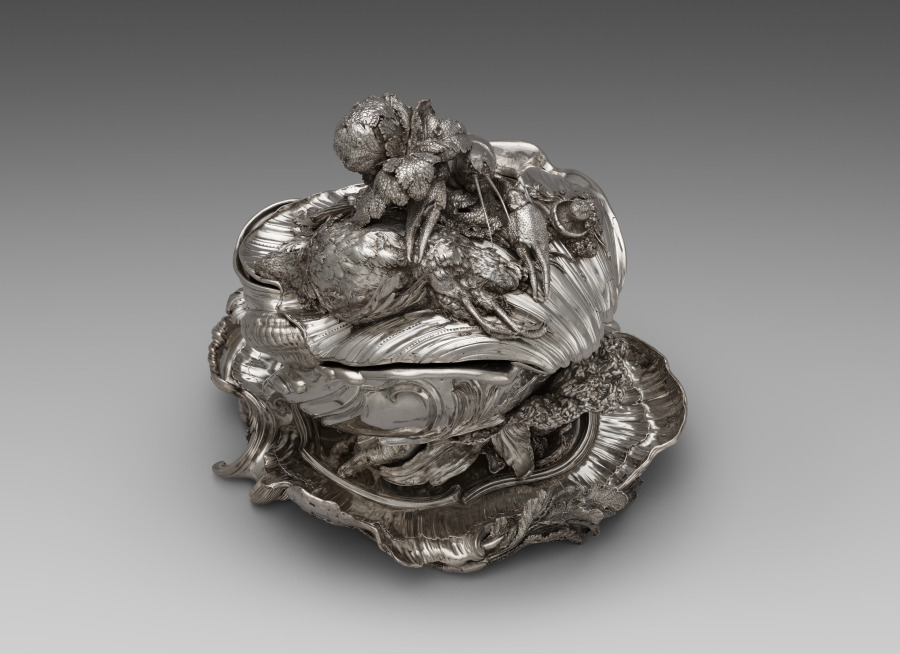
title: Covered Tureen on Stand (Pot-à-oille)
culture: France, Paris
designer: Juste-Aurèle Meissonnier (French, 1695–1750)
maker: Pierre-François Bonnestrenne (French)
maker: Henry Adnet (French, 1745)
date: 1735–38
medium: silver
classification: Silver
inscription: [Maker’s mark of Pierre−François Bonnestrenne, beneath platter; inside tureen (two marks)]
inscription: [Warden's mark for Paris, 1734−1735, beneath platter; inside tureen; inside cover]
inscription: [Charge mark of Hubert Louvet, Paris, 1732-1738, on platter border; beneath platter; beneath tureen; inside cover; inside tureen (two marks)]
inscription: [Discharge mark of Louis Robin mostly used for stamping small work, Paris 1738−1744, on platter border; beneath tureen]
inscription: [Warden's mark for Paris, 1736−1737, on platter border]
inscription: [Possibly British import mark, London, 1925, on platter border]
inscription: [Possibly mark of the British firm Charles & Richard Comyns, on platter border]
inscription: [Discharge of Louis Robin mostly used for stamping gold and silver between 1738 and 1744, beneath tureen; outside cover]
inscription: [Maker’s mark of Henry-Guillaume Adnet, inside cover]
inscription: [Two small undefined marks, inside cover]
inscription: [Under the surface of the platter the engraved signature]: “FAIT-PAR-I-A-MEISSONIER-ARCHITECTTE”; [and the weight] “673=5"; “No. [v] I 50 £ b76Sol”; [and the numbers] “A nº 1”; “A nº2”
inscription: [On tureen lip]: "MEISSONIER"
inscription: [On tureen lip]: “A nº 3”; “A nº2” [in order to place the tureen correctly on the stand]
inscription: [Numbers engraved on the stand, the tureen, and the cover to show how the piece should be assembled]: “A nº 1” [on the base of the tureen; beneath the cover; on the platter], “A nº 2” [on the platter], “A nº 3” [on the exterior rim of the tureen], “A nº4”; “A nº 5” [outside the cover], “A nº 7” [on the border of the platter]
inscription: [Two warden's marks for Paris, 1735-1736, beneath tureen]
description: This tureen exemplifies the French Rococo style, an artistic movement celebrating naturalistic forms that developed in Paris during the early 1700s. In contrast to classical, controlled symmetry, Rococo forms morph, twist, and spill into the space around them. Meissonnier embellished this tureen in a picturesque arrangement of vegetables and creatures, transforming a utilitarian object into a decadent display of wealth and abundance. This masterpiece comes from a set of two tureens commissioned by the English Duke of Kingston during an extended stay in Paris in the 1730s.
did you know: The langoustine, pigeon, and vegetables were cast using real examples giving the silver copies lifelike detail and appearance.